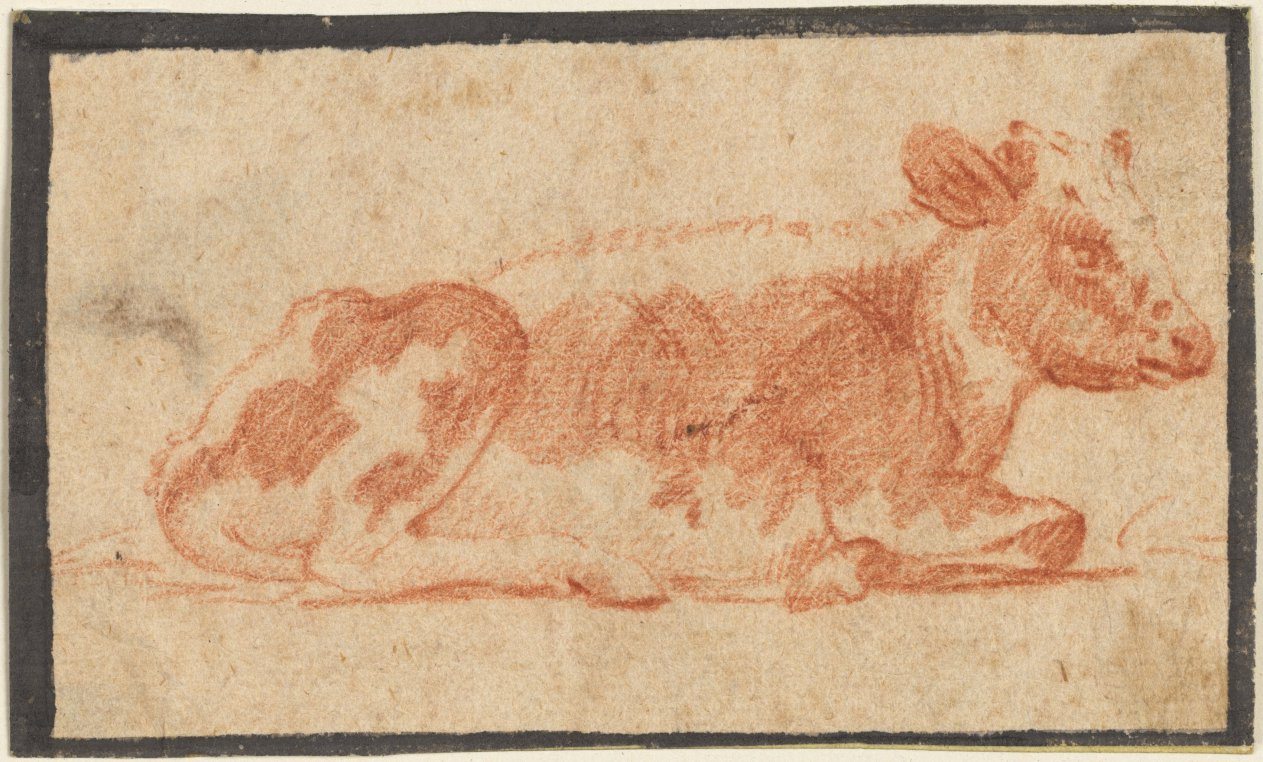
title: Cow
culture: Germany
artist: Johann Heinrich Roos (German, 1631–1685)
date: second half 1600s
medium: red chalk; framing lines in brush and black ink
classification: Drawing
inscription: SECONDARY SUPPORT, in brown ink: F:H: Roos fecit.